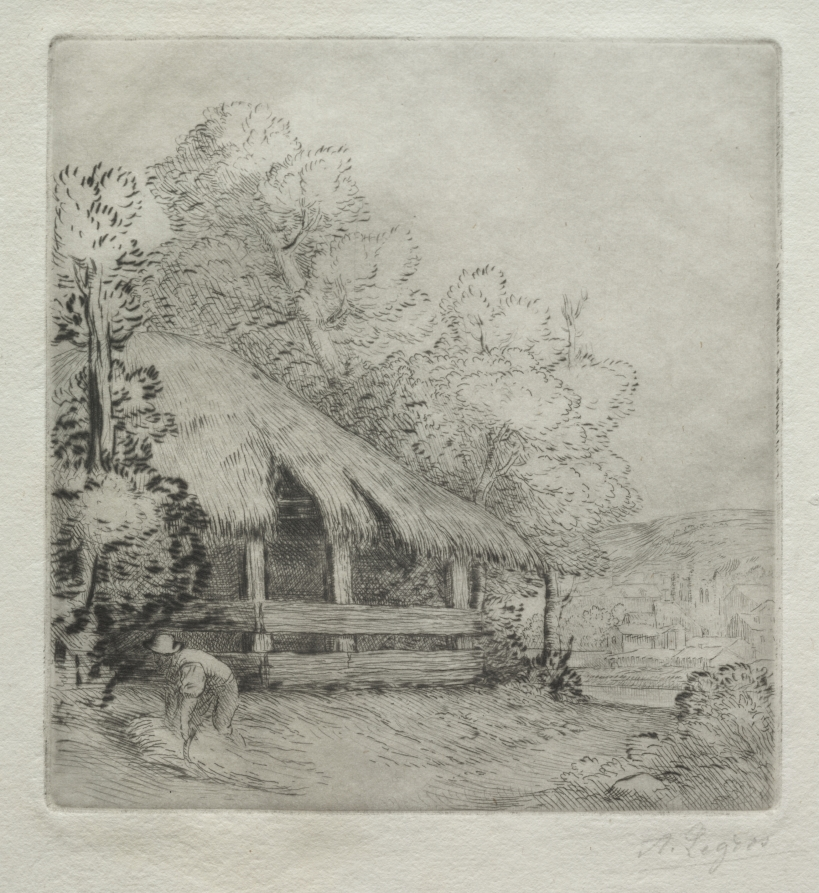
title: The Little Shed (Le Petit Hangar)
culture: France, late 19th-early 20th Century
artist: Alphonse Legros (French, 1837–1911)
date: c. 1857–1911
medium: etching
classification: Print